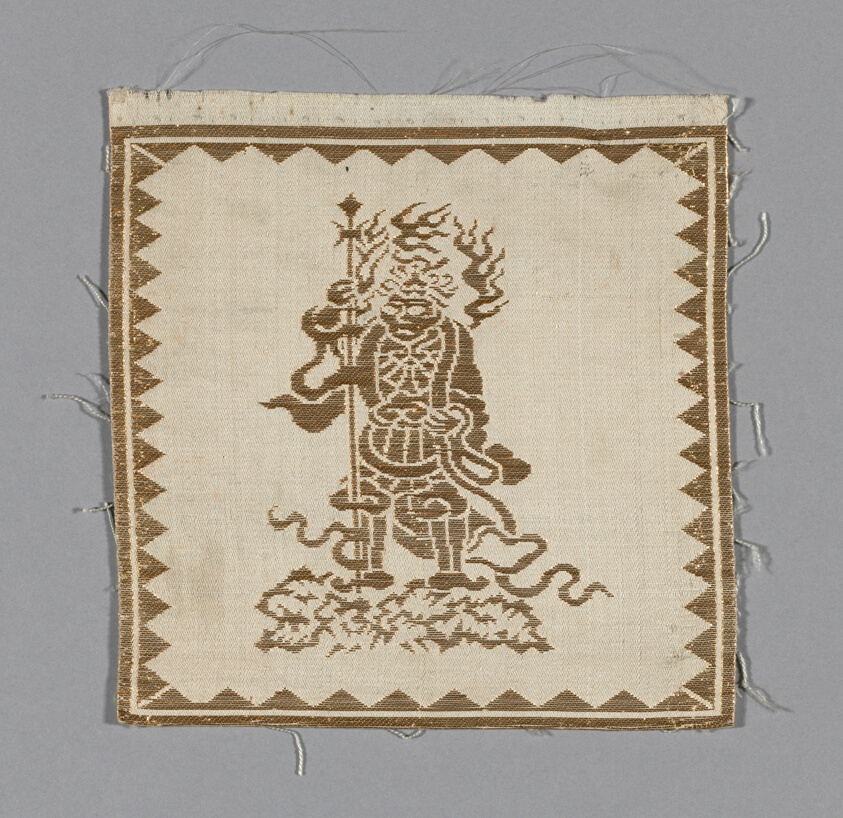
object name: Textile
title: Fragment (Shitenno from Kesa)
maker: Japan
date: Meiji period (1868–1912), 1875/1900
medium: Silk and gold-leaf-over-lacquered-paper-strip twill weave with supplementary patterning wefts bound by secondary binding warps in twill interlacings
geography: Japan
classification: textile; weaving; liturgical - buddhist